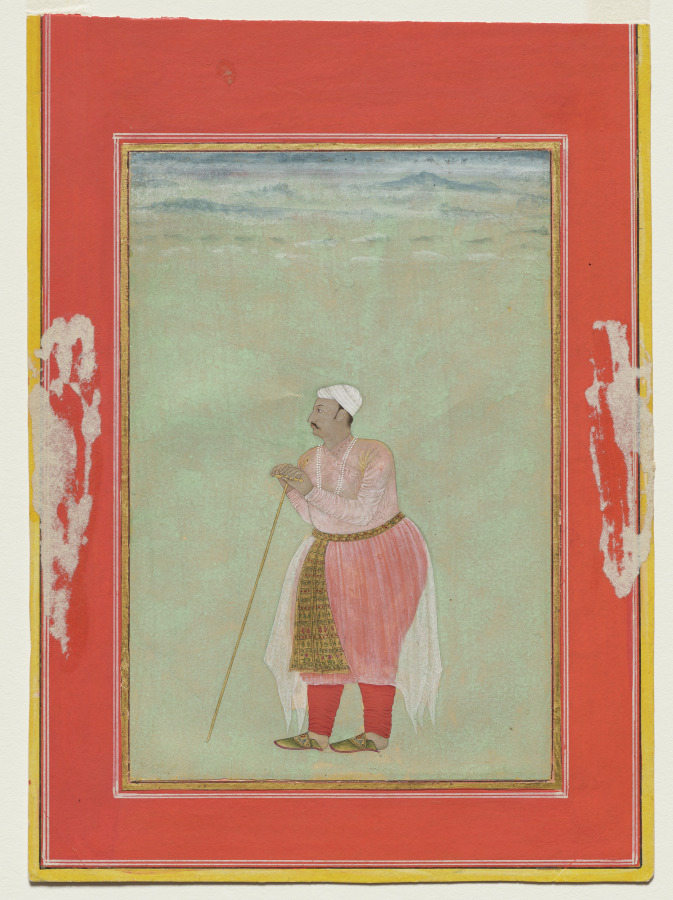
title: Portrait of Maharaja Rai Singh of Bikaner (reigned 1574–1612)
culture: Northwestern India, Rajasthan, Rajput Kingdom of Bikaner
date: c. 1610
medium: Gum tempera and gold on paper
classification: Painting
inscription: handwritten inscription identifying the subject, on the verso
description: The portly Rajput king wears a long, belted tunic tied under the left arm—the custom of most Hindus. His berry-hued garments stand in pleasing contrast against the teal green background that references the lushness of paradise. Though the artist is unidentified, the naturalistic sensitivity of the portrait and delicacy of the garments imply the work of a master court painter, probably following a model by Nur Muhammad. Rai Singh had an illustrious career serving his overlord the Mughal emperor Akbar (reigned 1556–1605), and his daughter was married to Akbar’s son, Jahangir (reigned 1605–27).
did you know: This painting is based on a drawing also in the CMA collection (1987.1100).